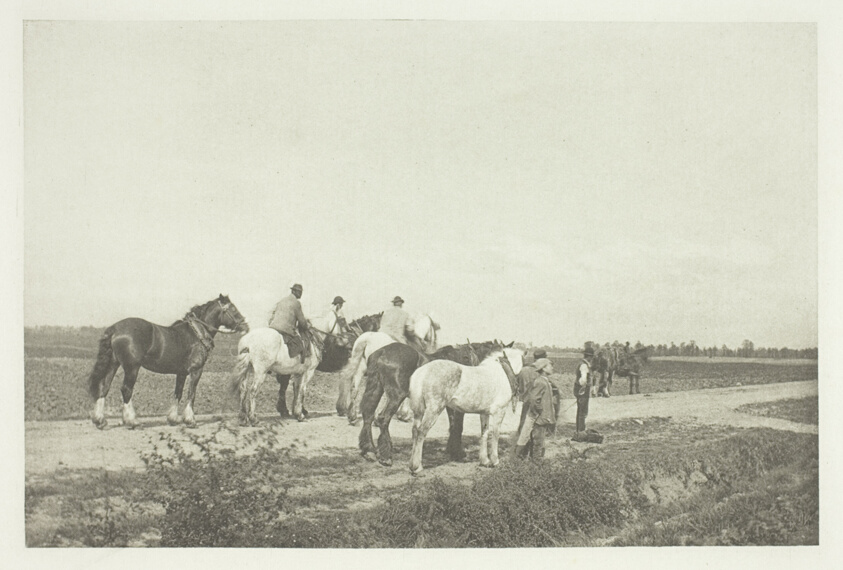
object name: Photograph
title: Homewards from Plough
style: 19th century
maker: Mr. J. Gale (English, died 1906)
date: c. 1889, printed October 1889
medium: Photogravure, from "Sun Artists, Number 1" (1889)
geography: England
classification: photogravure; photomechanical process; photography; photograph